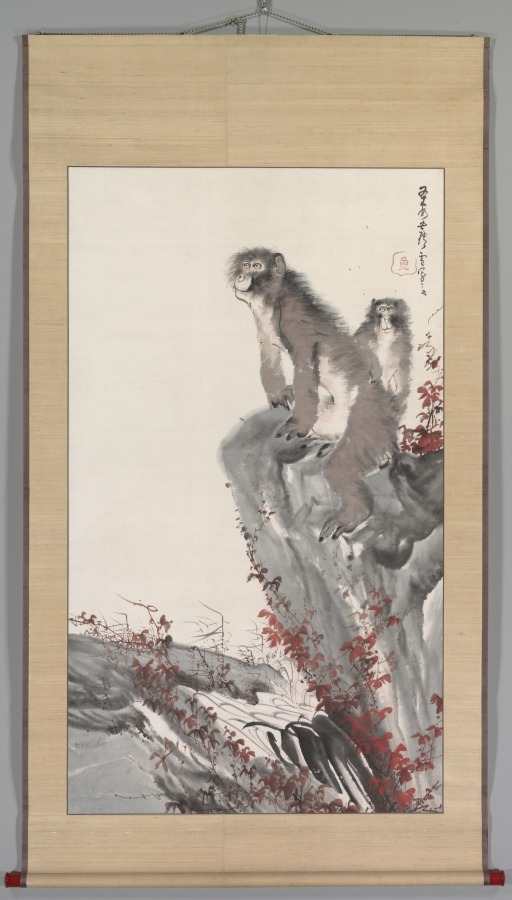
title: Monkeys by a Stream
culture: Japan, Edo period (1615–1868)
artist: Nagasawa Rosetsu (Japanese, 1754–1799)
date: c. 1796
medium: hanging scroll; ink and color on paper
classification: Painting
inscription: Inscription: 平安蘆雪寫意; Transliteration: Heian Rosetsu shai; Sealed: 魚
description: The two monkeys in this painting are Japanese macaques. The one in front dangles its left leg over a sharply angled rock, surveying the land beyond a fast-moving mountain stream. A smaller monkey sits behind it, looking directly ahead as if it realizes it is being watched. The artist used just a few highly contrasting warm and cool colors, sweeping brushstrokes over ink washes, and loose lines to create a scene that powerfully evokes the mentally engaged state of the two animals.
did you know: Monkeys, which are found throughout the mountainous and wooded areas of Japan, became a favorite subject of many later Japanese artists.